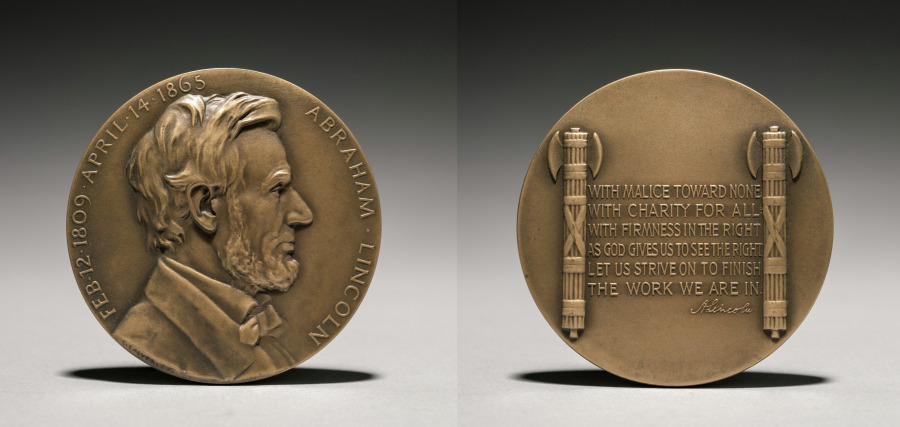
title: Abraham Lincoln Medal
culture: America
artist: Charles Calverley (American, 1833–1914)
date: 1900s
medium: bronze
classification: Metalwork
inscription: obverse - right-hand side: "FEB.12.1809 APRIL.14.1865"; left-hand side: "ABRAHAM LINCOLN." Below: "C. Calverley." reverse - "WITH MALICE TOWARD NONE/ WITH CHARITY FOR ALL/ WITH FIRMNESS IN THE RIGHT/ AS GOD GIVES US TO SEE THE RIGHT/ LET US STRIVE ON TO FINISH/ THE WORK WE ARE IN/ ALincoln [in ligature]."